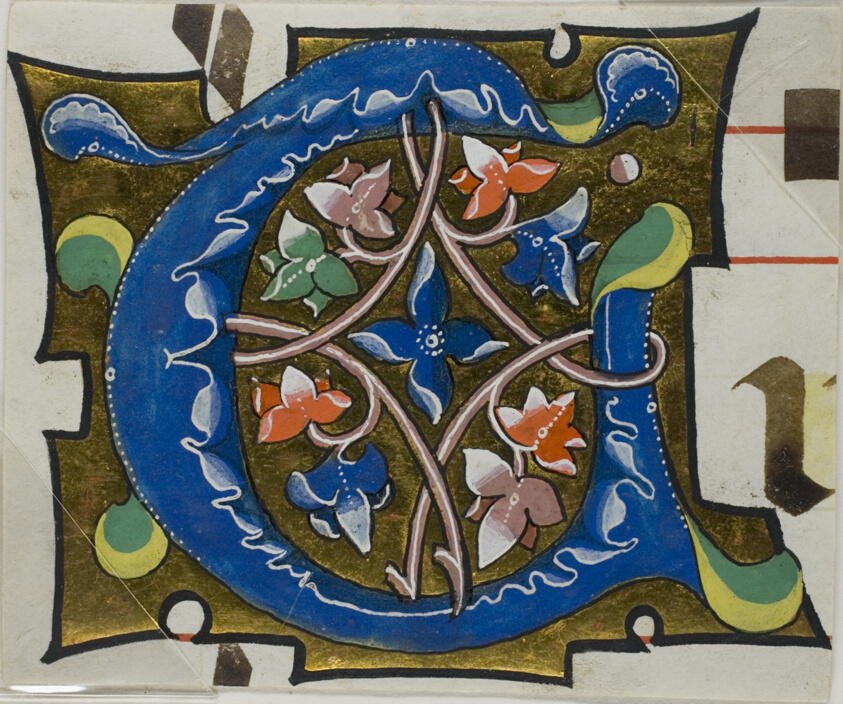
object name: Drawing and Watercolor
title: Decorated Initial "T" with Flowers from a Choirbook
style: medieval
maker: Unknown Artist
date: 19th century imitation of 14th century style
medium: Manuscript cutting in tempera and gold leaf, with red and warm black ink, on vellum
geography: Europe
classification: tempera; manuscript; drawings (visual works); prints and drawing